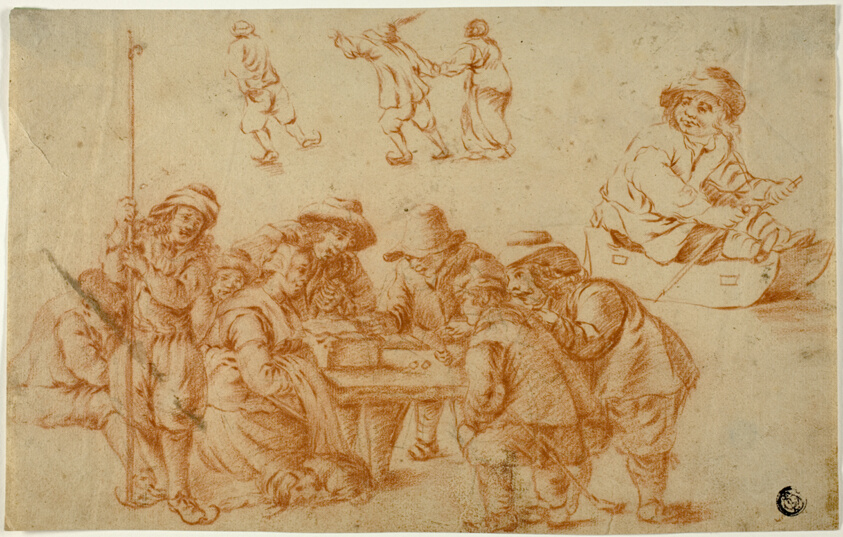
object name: Drawing and Watercolor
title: Sketches of Peasants Playing Dice and Skating; Sketch of Boy on Sled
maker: Adriaen van Ostade (Dutch, 1610-1685)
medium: Red chalk, on buff laid paper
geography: Holland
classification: chalk; drawings (visual works); prints and drawing